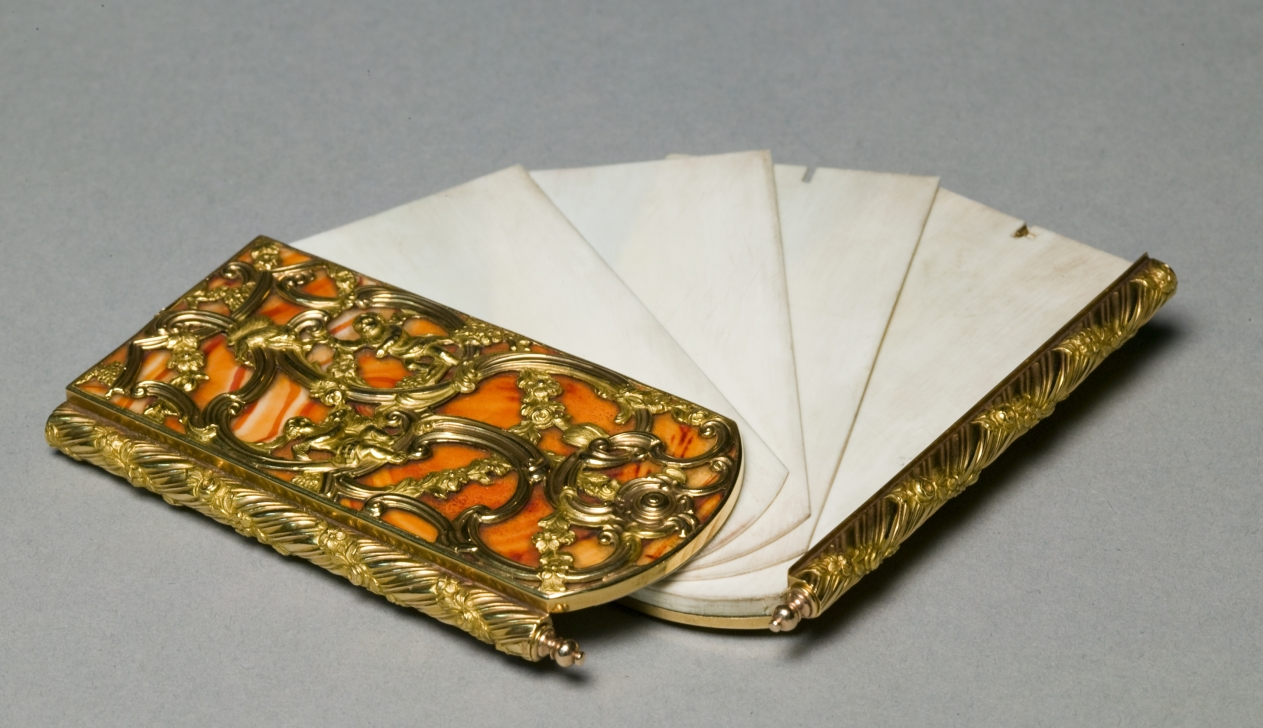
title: Writing Tablet (Aide-Mémoire)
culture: England, 18th century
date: c. 1760–70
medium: gold, agate, gold-mounted pencils, ivory writing tablets, mirror, manicure set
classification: Miscellaneous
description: Luxurious personal objects were an essential part of a privileged wardrobe during the 1700s and early 1800s, emphasizing their owner’s refinement and wealth. Jewelry, miniatures, and writing tablets were often given as intimate gifts, intended to be seen and admired. Their glittering surfaces, however, disguised a system based on the labor and suffering of enslaved people and the decimation of elephant populations across Africa. Throughout the 1700s and 1800s, the ivory and slave trades were closely intertwined, as indigenous people and elephant tusks were transported and sold along the same routes. Slavery was not abolished in much of the British Empire until 1833. Britain and other European nations continued to pursue colonialism with a sense of superiority that found its way into all aspects of life, including decorative objects glorifying their conquests.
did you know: During the 1700s, many wealthy women wrote personal notes on little thin sheets of polished ivory like this one and later wiped the tablet clean with a damp cloth.